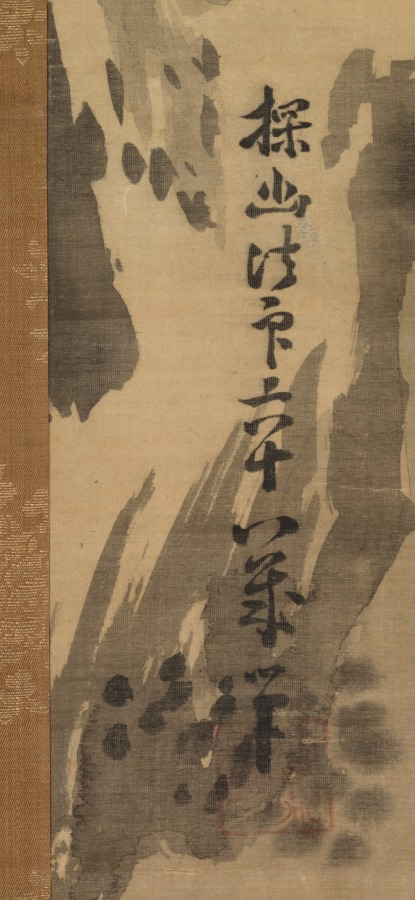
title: Chinese Bird on Snow-Laden Branch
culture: Japan, Edo period (1615–1868)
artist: Kano Tan’yū (Japanese, 1602–1674)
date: 1661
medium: One of a triptych of hanging scrolls; ink and slight color on silk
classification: Painting